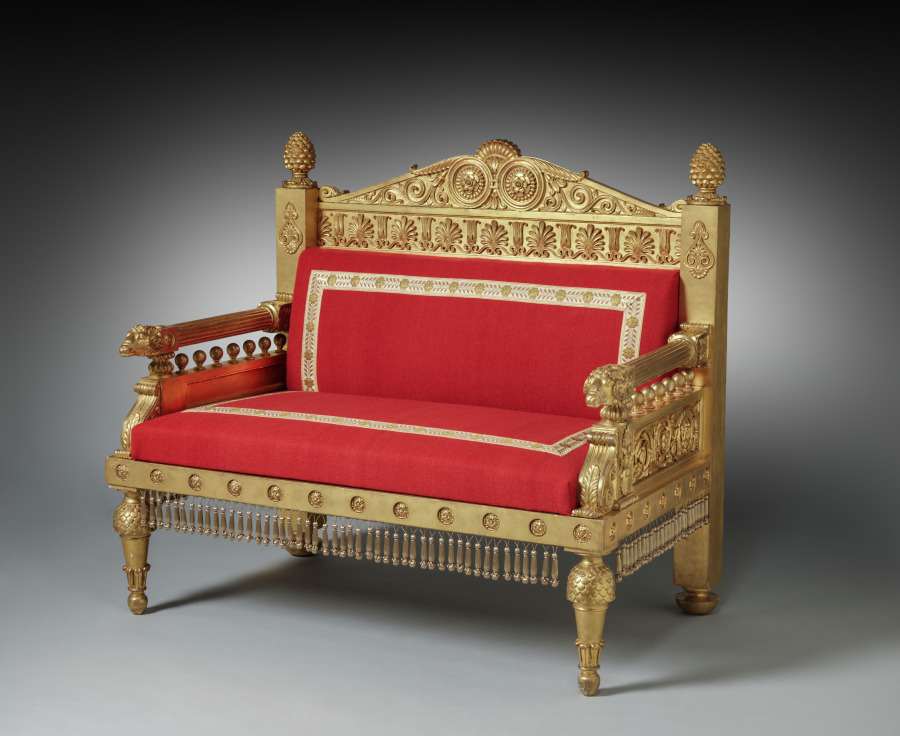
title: Settee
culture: England, 19th century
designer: Thomas Hope (British, 1769–1831)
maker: Unknown Maker (British)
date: c. 1802–07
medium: gilt-wood, reproduction wool upholstery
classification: Wood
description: An art collector, designer, and champion of neoclassicism, Thomas Hope designed this settee for display in his London house. Hope’s design exemplifies the continued interest in neoclassical ornament around 1800 through the use of elaborately carved friezes, a central pediment, and a lavishly gilded surface. In 1807 Hope published Household Furniture and Interior Decoration, featuring descriptions of his renowned collection of antiquities and the interior furnishings from his London house, including this settee. Many architects and cabinetmaking firms took inspiration from Hope’s designs, adapting Greek and Roman forms to create bold expressions of neoclassicism in their architecture and decoration.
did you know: The acorn finials, ram’s heads, and clusters of stylized honeysuckle flowers along the settee’s frame are typical of Thomas Hope’s neoclassical designs.